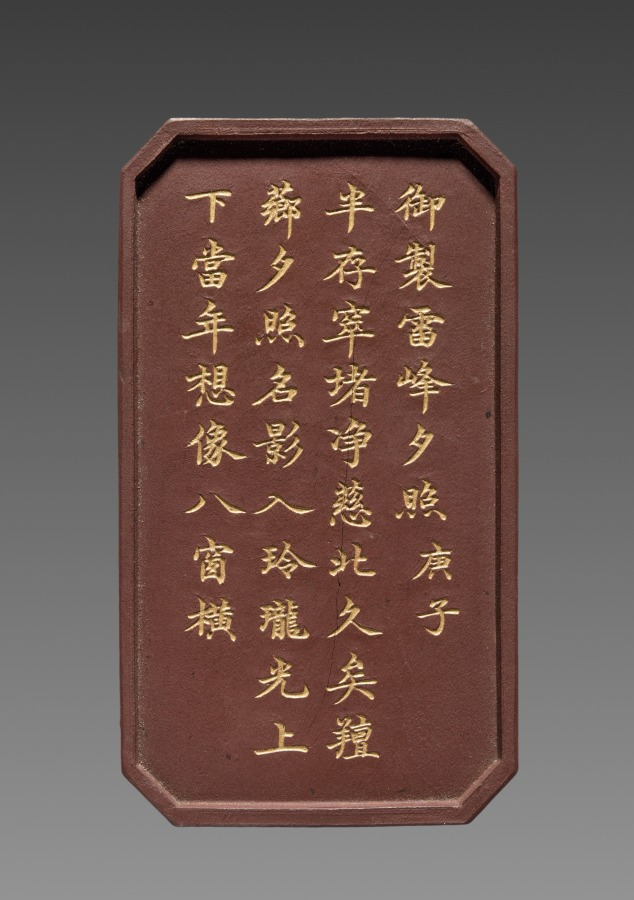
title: Ink Stick from an Imperially Commissioned Set of Ink Stick with Images and Poems of Famous West Lake Sites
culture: China, Qing dynasty (1644–1911), Qianlong reign (1736–95)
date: 1780–94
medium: Molded ink in brown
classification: Miscellaneous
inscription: 乾隆年製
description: This is one of ten ink cakes of different shapes and colors stored in an exquisite lacquer box. Each is inscribed in gold with a poem by the Qianlong emperor, praising the ten famous sights of the Westlake in Hangzhou, near Shanghai. The Westlake is famous for its natural beauty; it was a favorite imperial destination and remains a tourist attraction today. Ink cakes (also called ink sticks) are dissolved with the addition of water and ground on the surface of a flat stone into liquid ink for painting and calligraphy. The precious ink cakes here, however, have never been used.